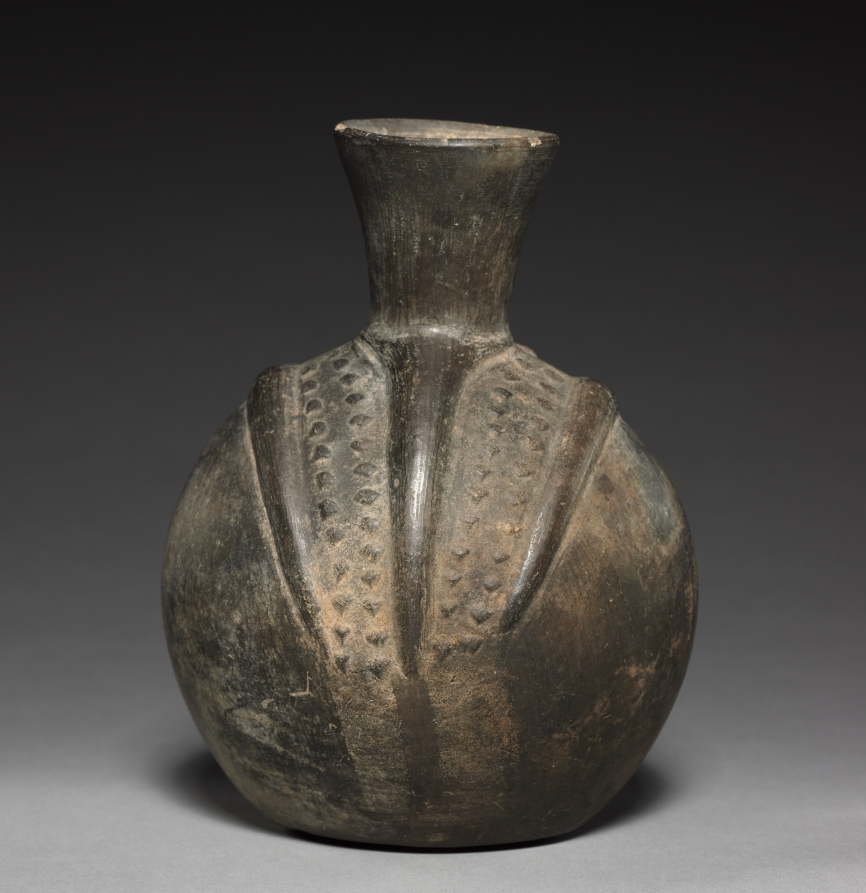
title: Bottle with Figure in Relief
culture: Peru, probably Chiclaya, Chimú, 13th-15th century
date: 1200s-1400s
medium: black ware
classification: Ceramic